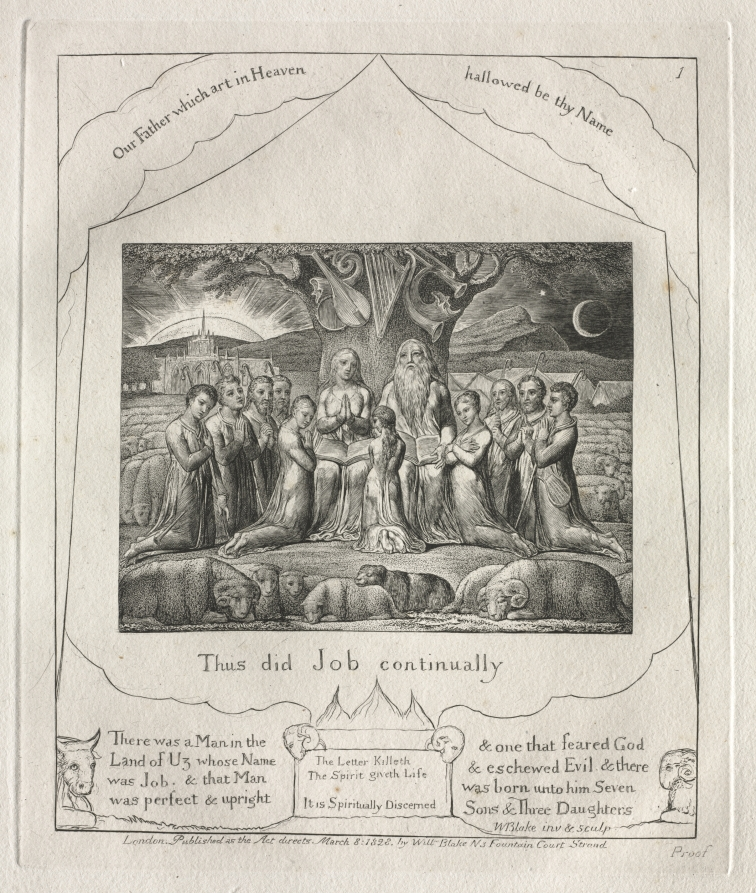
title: The Book of Job: Pl. 1, Thus did Job continually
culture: England, 18th century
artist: William Blake (British, 1757–1827)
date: 1825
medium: engraving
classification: Portfolio